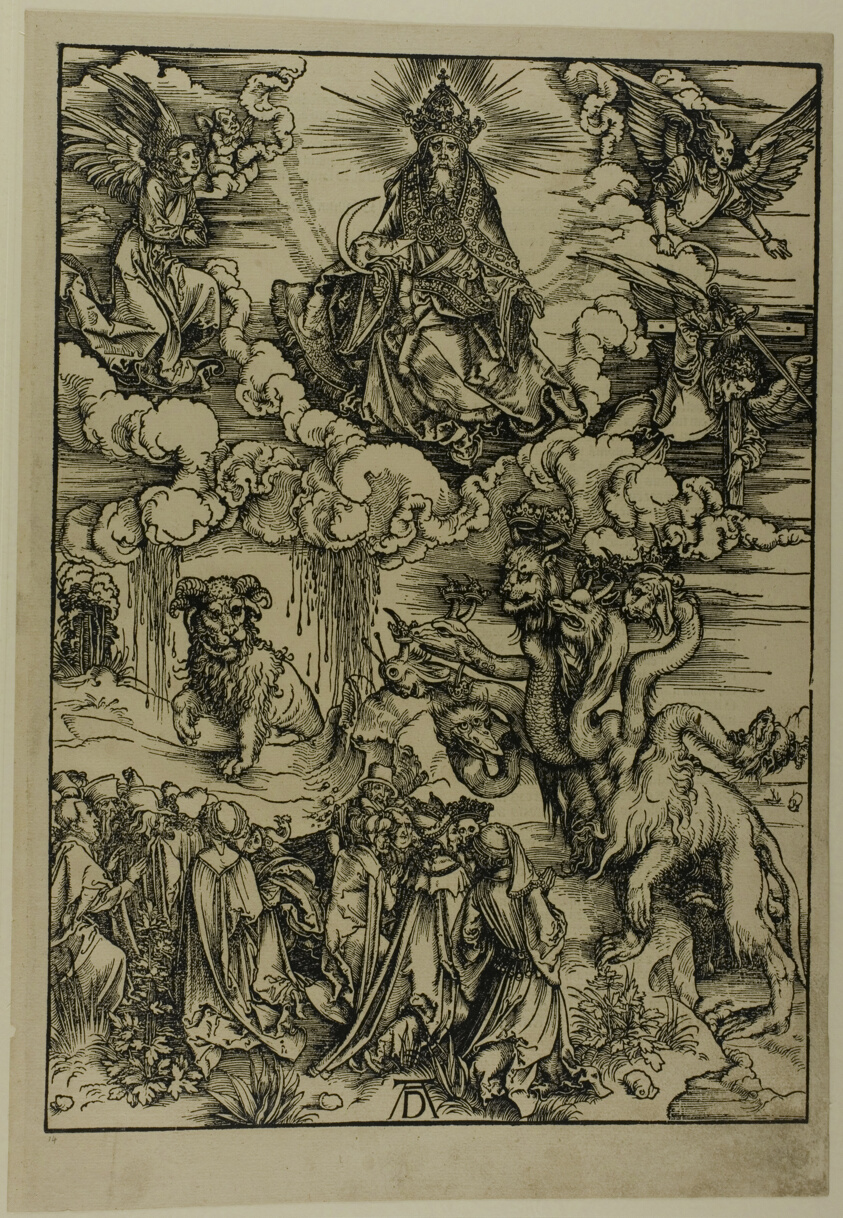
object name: Print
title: The Beast with Two Horns like a Lamb, from The Apocalypse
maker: Albrecht Dürer (German, 1471-1528)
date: c. 1496–98, published 1511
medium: Woodcut in black on tan laid paper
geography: Germany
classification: woodcut; print; prints and drawing; paper